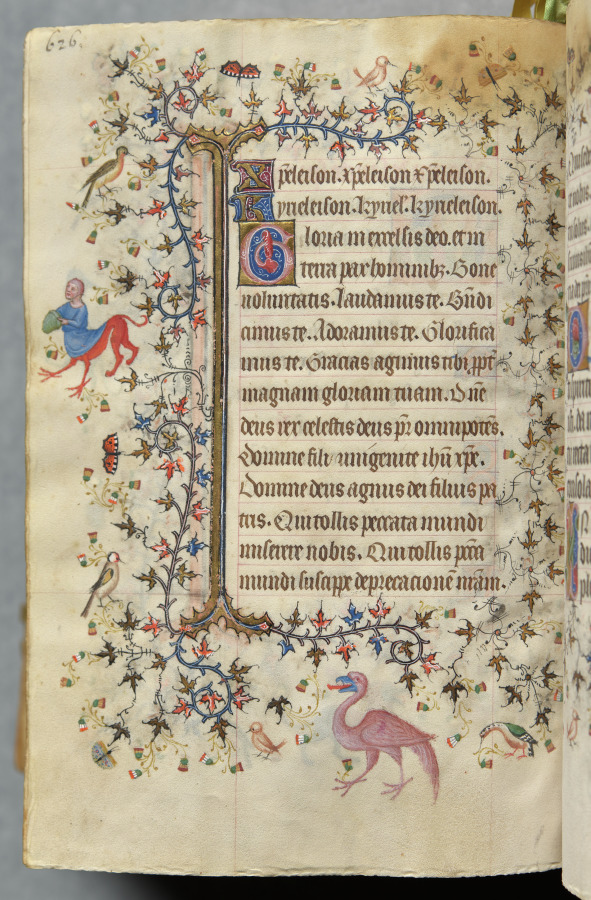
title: Hours of Charles the Noble, King of Navarre (1361-1425): fol. 307v, Text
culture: France, Paris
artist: Master of the Brussels Initials and Associates (French)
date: c. 1405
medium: ink, tempera, and gold on vellum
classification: Bound Volume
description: This precious volume was obviously highly prized by its owner, the French-born King of Navarre, who had his coat of arms painted on no less than twenty folios. Rather than directly commissioning this manuscript from a specific workshop, it seems that Charles the Noble acquired his book of hours -- perhaps ready-made for the luxury market -- while on a trip to Paris in 1404-05. A collaborative effort, six painting styles are evidenced within the pages of this codex, those of two Italians, two Frenchmen, and two Netherlanders. The painter who was responsible for the planning and decoration of the book, and who produced seventeen of the large miniatures, was a Bolognese artist known as the Master of the Brussels Initials. His principal assistant, responsible for most of the borders, was a Florentine who signed his name "Zecho" da Firenze on folio 208 verso.